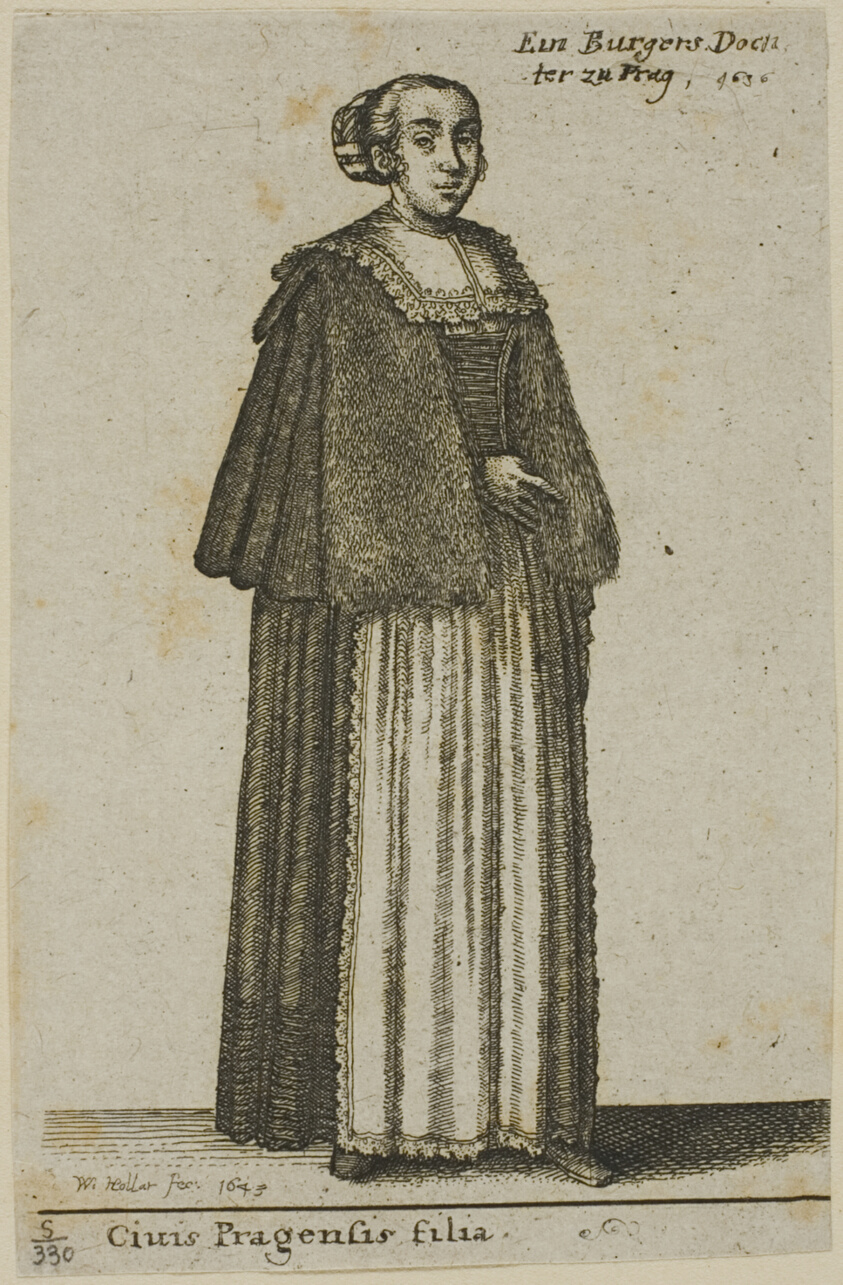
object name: Print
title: Prague Girl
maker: Wenceslaus Hollar (Bohemian, 1607-1677)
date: 1643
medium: Etching on gray Asian paper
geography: Bohemia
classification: etching; print; prints and drawing